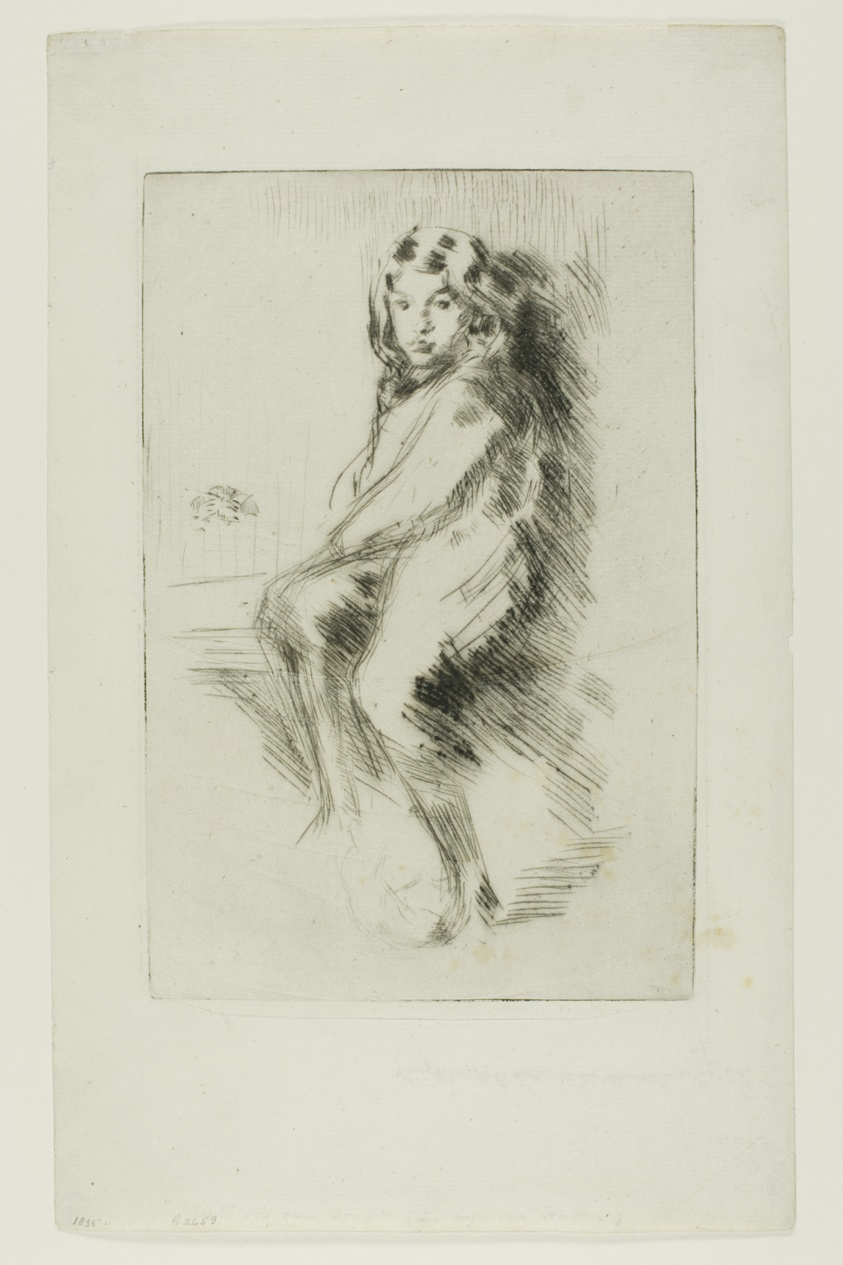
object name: Print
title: The Boy (Charlie Hanson)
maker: James McNeill Whistler (American, 1834-1903)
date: 1875/1876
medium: Drypoint in black ink on ivory laid paper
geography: United States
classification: drypoint; print; prints and drawing; paper